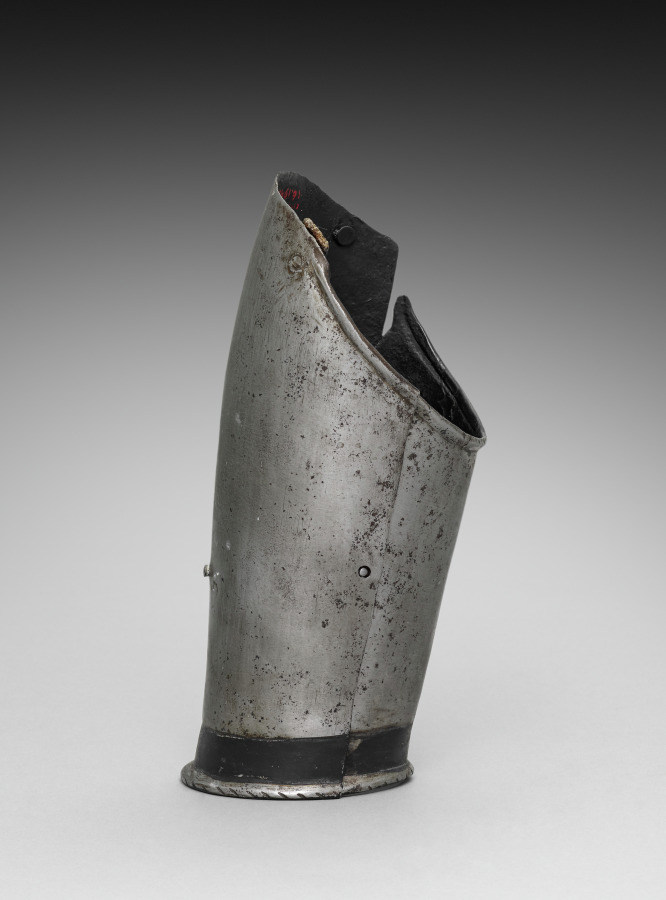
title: Left Vambrace (lower cannon)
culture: Germany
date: c.1550–1570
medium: iron, steel, leather and brass rivets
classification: Arms and Armor